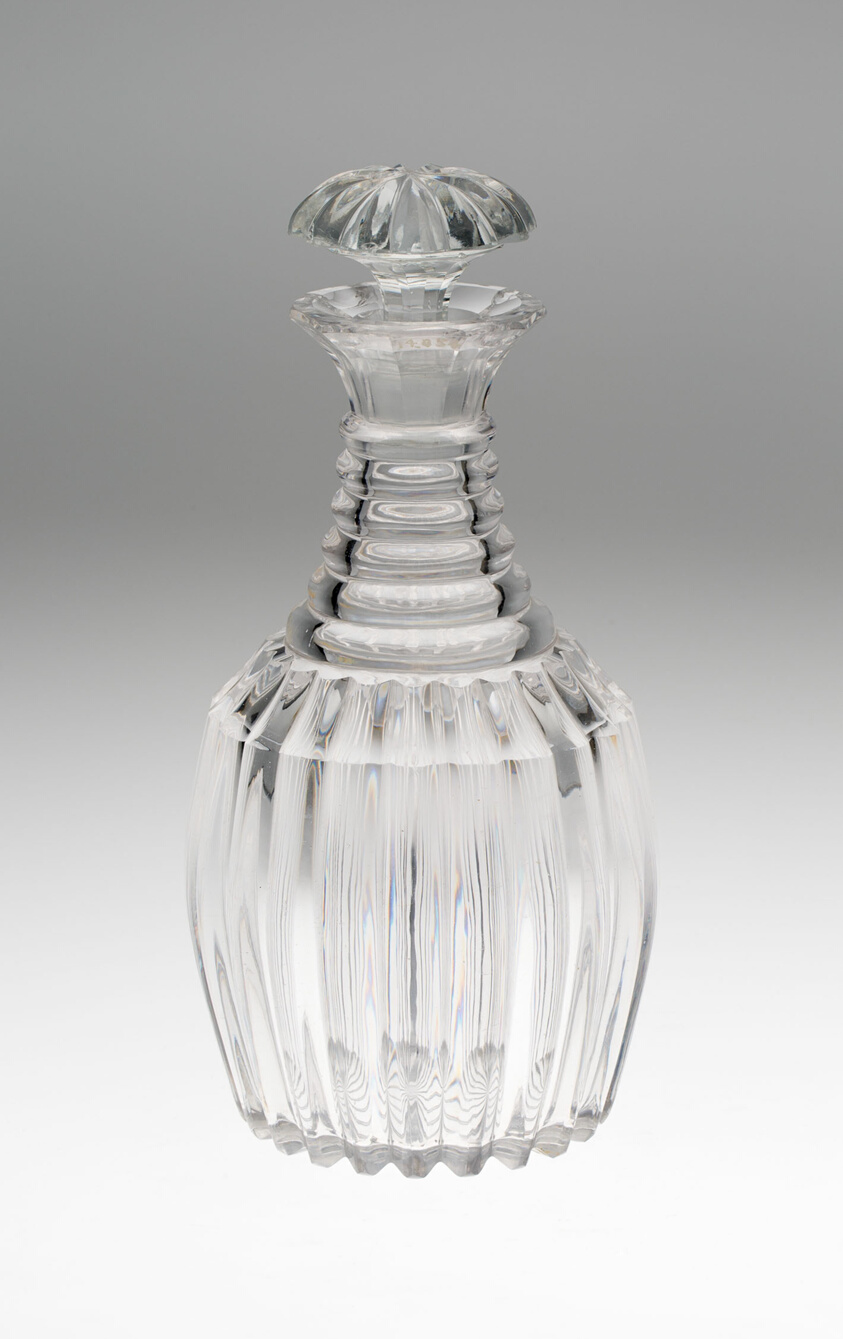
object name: Glass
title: Claret Decanter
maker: England, Sussex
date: Early 19th century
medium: Glass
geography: Sussex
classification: glass; european decorative arts